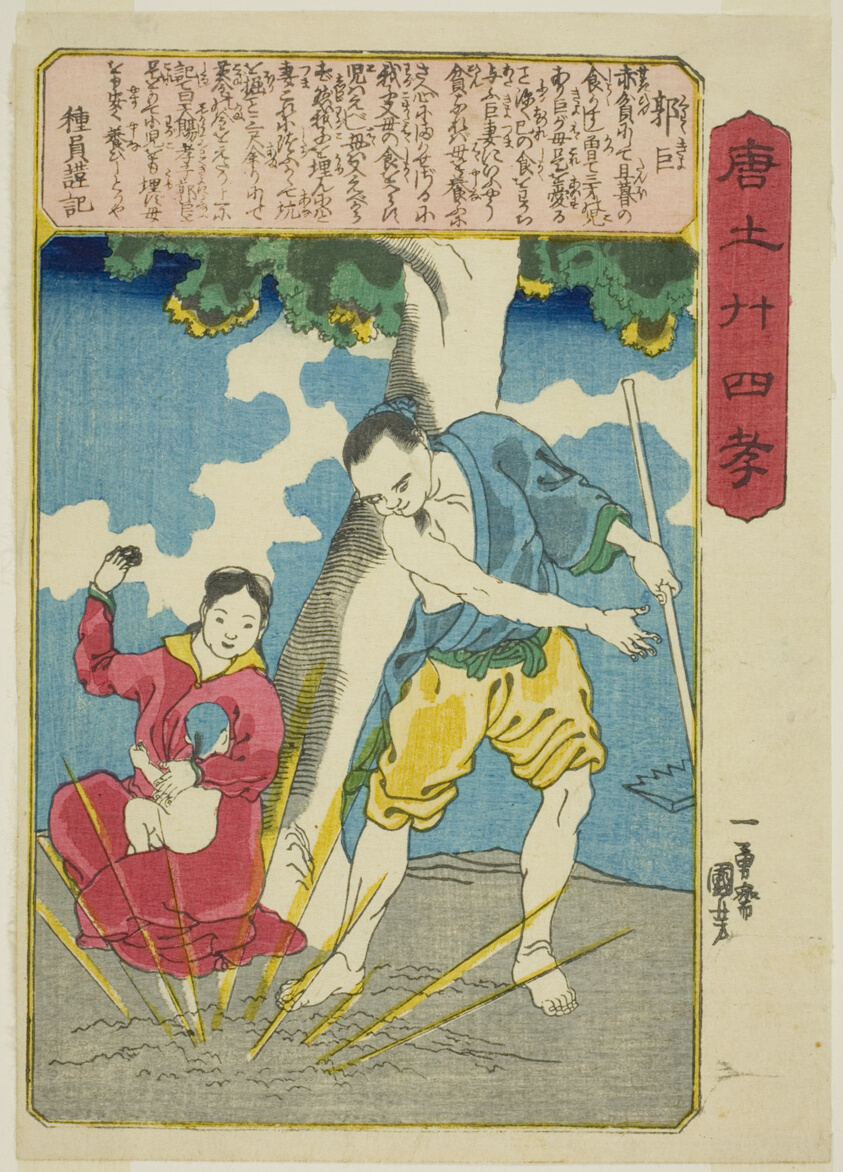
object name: Print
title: Guo Ju (Kaku Kyo), from the series "Twenty-four Paragons of Filial Piety in China (Morokoshi nijushiko)"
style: Japanese (culture or style)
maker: Utagawa Kuniyoshi (Japanese, 1797-1861)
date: c. 1848/50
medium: Color woodblock print; chuban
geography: Japan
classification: woodblock print; print; asian art